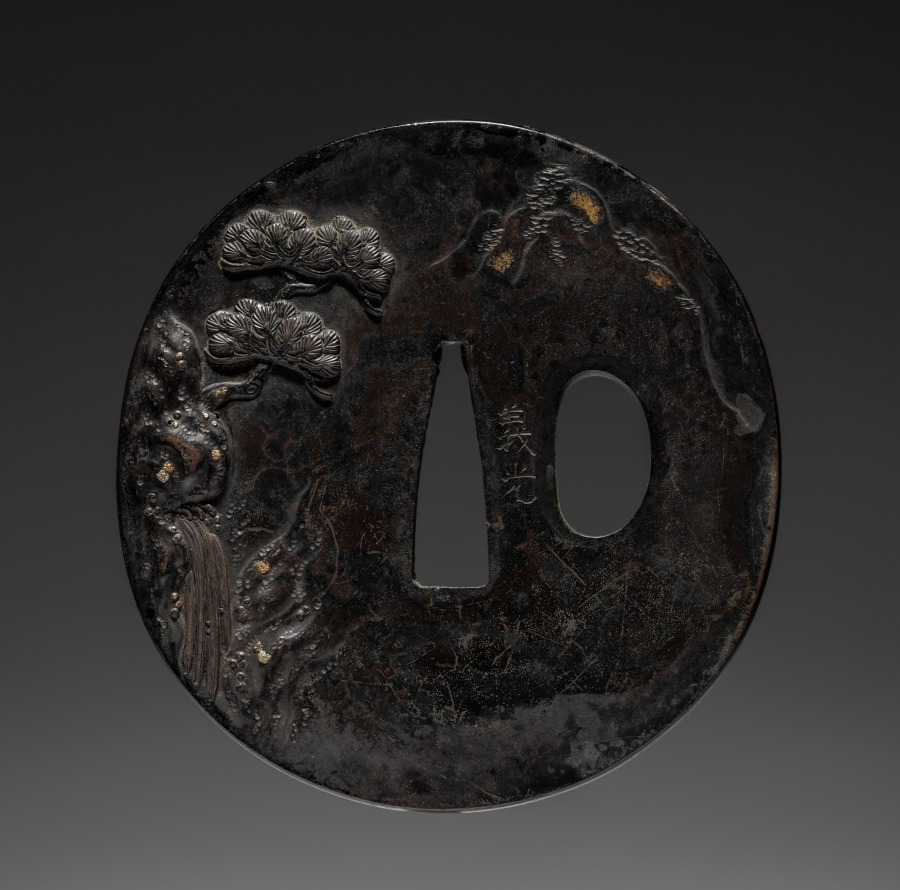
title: Sword Guard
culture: Japan, Edo period (1615–1868)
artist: Yoshimitsu (Japanese)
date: mid-1800s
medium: iron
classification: Arms and Armor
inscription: Signature: Yoshimitsu